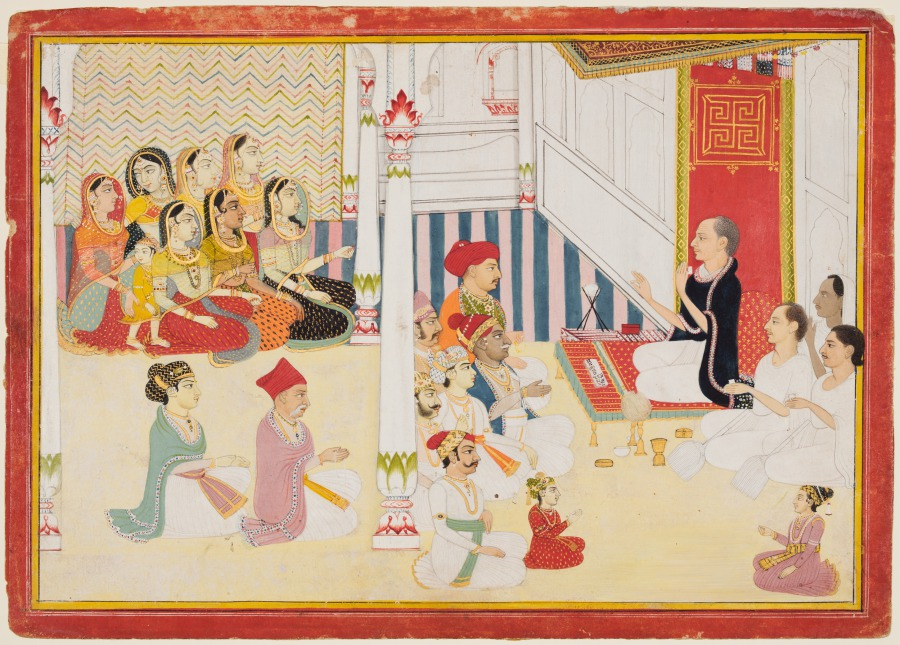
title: Shvetambara Jain Teacher Giving Instruction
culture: Northwestern India, Rajasthan, Rajput Kingdom of Jaipur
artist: possibly by Sahib Ram (Indian, active 1745–1803)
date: c. 1750–60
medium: gum tempera and gold on paper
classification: Painting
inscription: [[in the manuscript before the preacher]] ??? oṃ nama / siddha(ṃ)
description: A manuscript lies on a low table in front of the preacher, who holds one hand up in the gesture of discourse, and the other holds a cloth to shield his mouth from insects. The audience of laypeople includes men gathered near the front of the composition, and women in a group toward the back. The preacher and the white-clad figures behind him are Jain householder monks, permitted to grow hair and moustaches and to wear a colored shawl that indicates higher status. Householder monks in Rajasthan often served as scribes and maintained manuscript libraries.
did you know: The monks seated next to the teacher place their whisk-brooms before them.